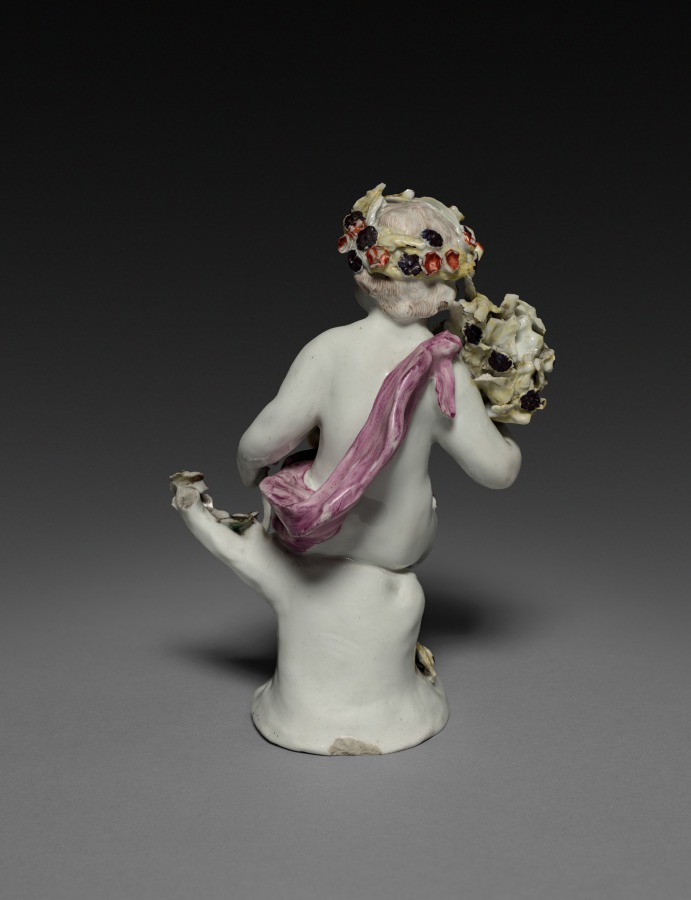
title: Summer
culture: England, Derby, 18th century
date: c. 1760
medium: soft-paste porcelain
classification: Ceramic